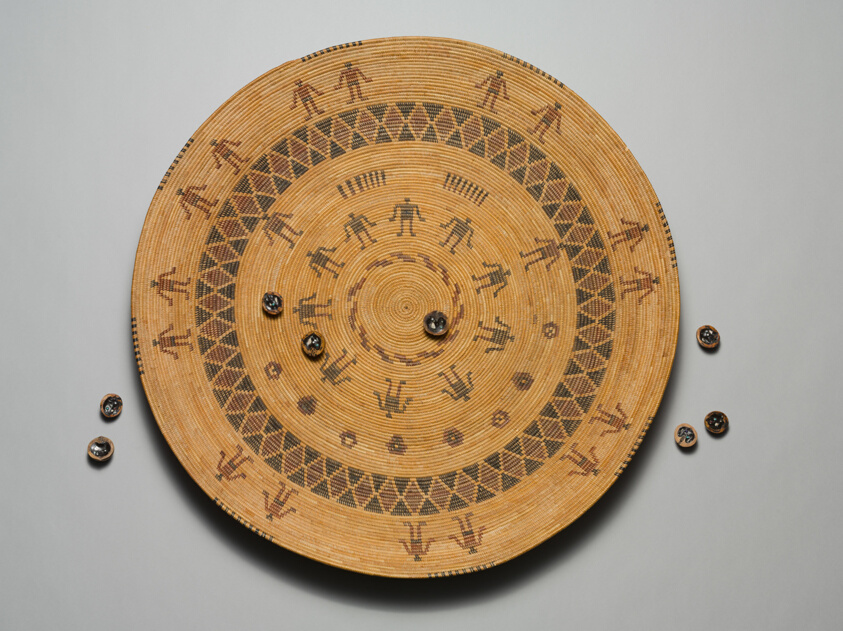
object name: Basketry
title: Gambling Tray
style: yokuts, native american, americas, california coast, native north american, Arts of the Americas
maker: Yokuts (Central California, United States)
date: c. 1900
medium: Plant fibers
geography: Central California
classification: basketry; art of the americas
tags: basketry, geometric, figures (representations), gambling, games